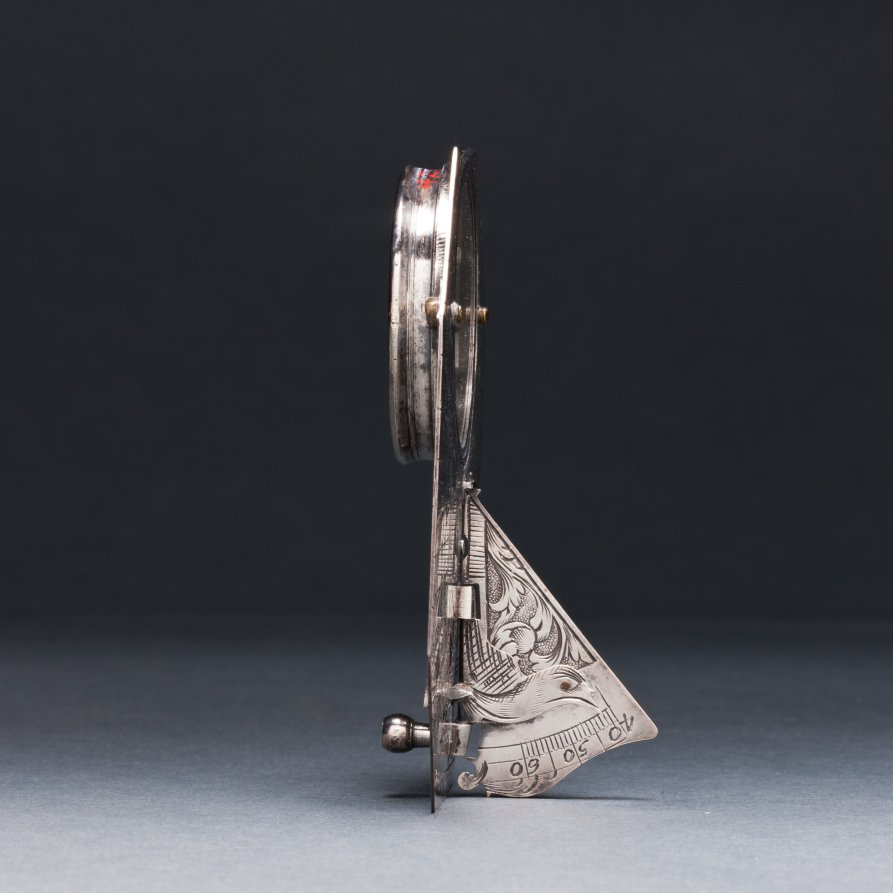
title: Butterfield Sundial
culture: France, 18th century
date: 1700s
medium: silver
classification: Silver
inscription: [Engraved signature above the compass in ribbon band]: "N. BION A Paris"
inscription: [Engraved on the face of the sundial]: “Pour 55° 4-5-6-7-8-9-10-11 50° IIII-V-VI-VII-VIII-IX-X-XI 45° 5-6-7-8-9-10-11 40° -VI-VII-VIII-IX-X-XI'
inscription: [Engraved on the other side]: "Pour 55° -8-7-6-5-4-3-2-1-0 50°-VIII-VII-VI-V-IIII-III-II-I 45°-8-7-6-5-4-3-2-1 40°-VII-VI-V-IIII-III-II-I"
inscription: [Engraved around the compass]: “NORD-OUEST-SUD-EST”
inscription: [Engraved on the back of the sundial]: “Turin 44 Milan 46 Paris 49 Lion 46 Metz 49 Rome 42 Liege 51 Naples 44 Namur 50 Gennes 44 Marseille 43 Grenoble 45 Bayonne 43 Bruxelle 51 Londres 52 Nantes 47 Vienne 48 Toulon 43 Tours 47 Lille 51”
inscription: [Engraved around the back of the compass]: “Venise 45 Strasbourg 49 Amsterdam 52 Hambourg 54 Varsovie 52 La Rochelle 46”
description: Butterfield-type sundials are characterized by their adjustable gnomons, metal flaps that cast a shadow on the dial’s face to indicate the hour, and geographical indices. This sundial has a scale adjustable between latitudes of 40° to 60° north. The latitudes of 26 European towns are engraved on its back for quick reference. With an intricately engraved silver face, it would have functioned as a fashionable traveler’s accessory.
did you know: Butterfield-style sundials were named after Micheal Butterfield, an English scientific and mathematical instrument maker who worked in Paris between 1674 and 1724.